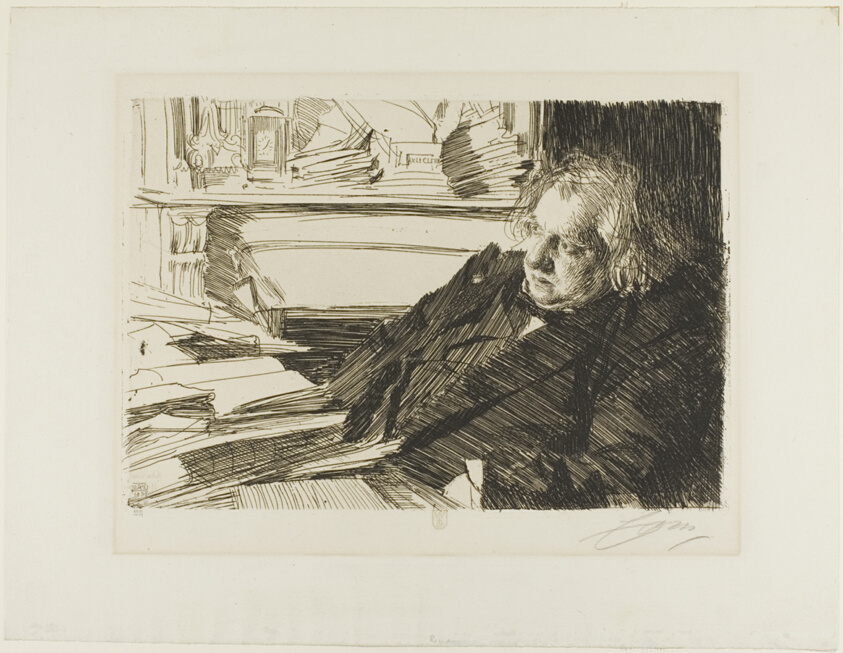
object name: Print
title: Ernest Renan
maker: Anders Zorn (Swedish, 1860-1920)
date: 1892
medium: Etching on ivory laid paper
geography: Sweden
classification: etching; print; prints and drawing